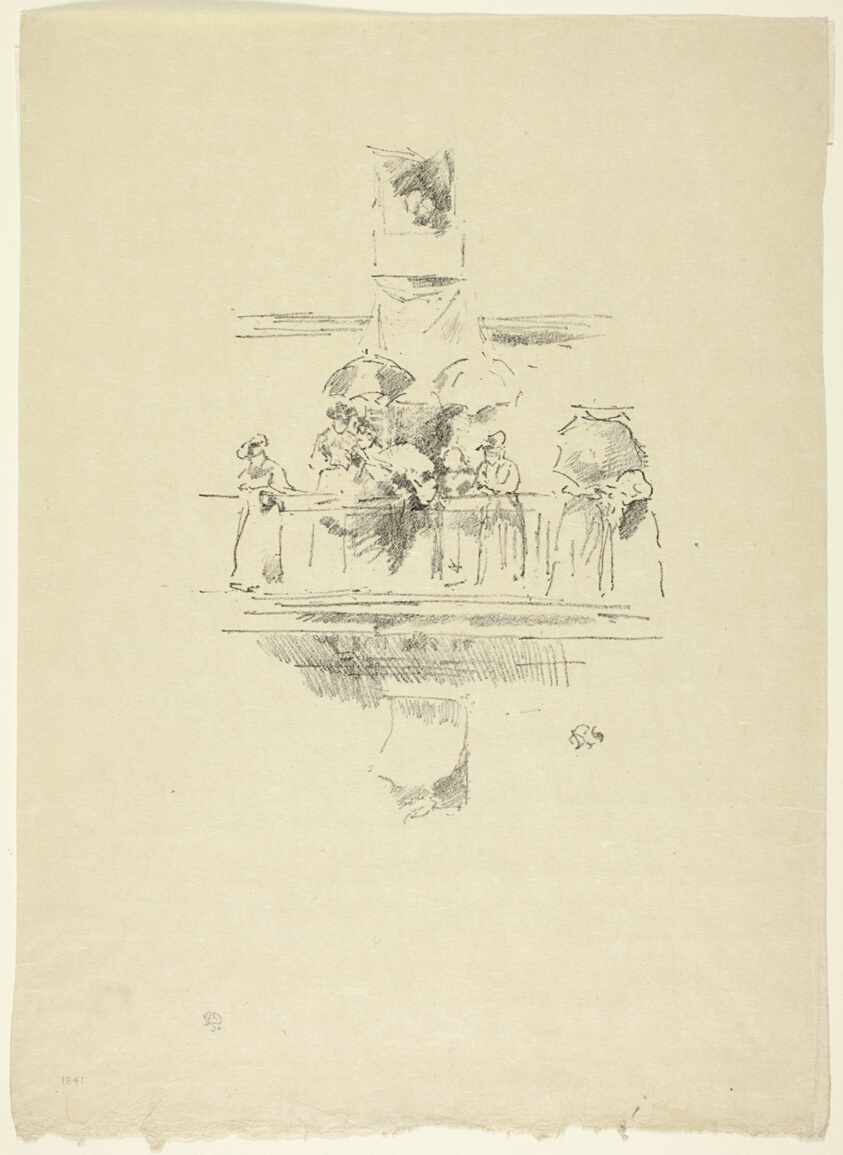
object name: Print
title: The Little Balcony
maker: James McNeill Whistler (American, 1834-1903)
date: 1894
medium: Transfer lithograph in black on cream laid Japanese vellum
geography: United States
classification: transfer lithograph; lithograph; print; prints and drawing